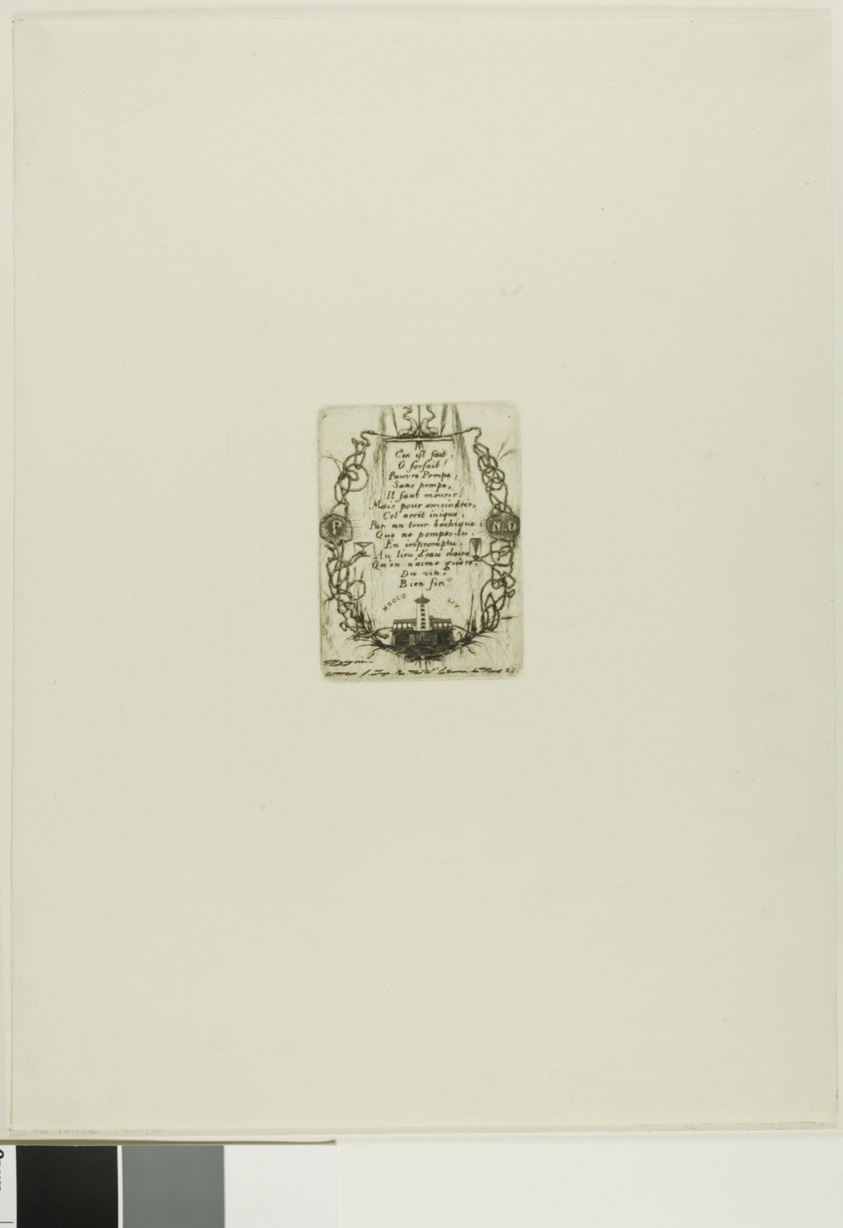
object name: Print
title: Pompe Notre-Dame, Paris (small plate)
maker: Charles Meryon (French, 1821-1868)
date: 1854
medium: Etching on ivory laid paper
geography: France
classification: etching; print; prints and drawing